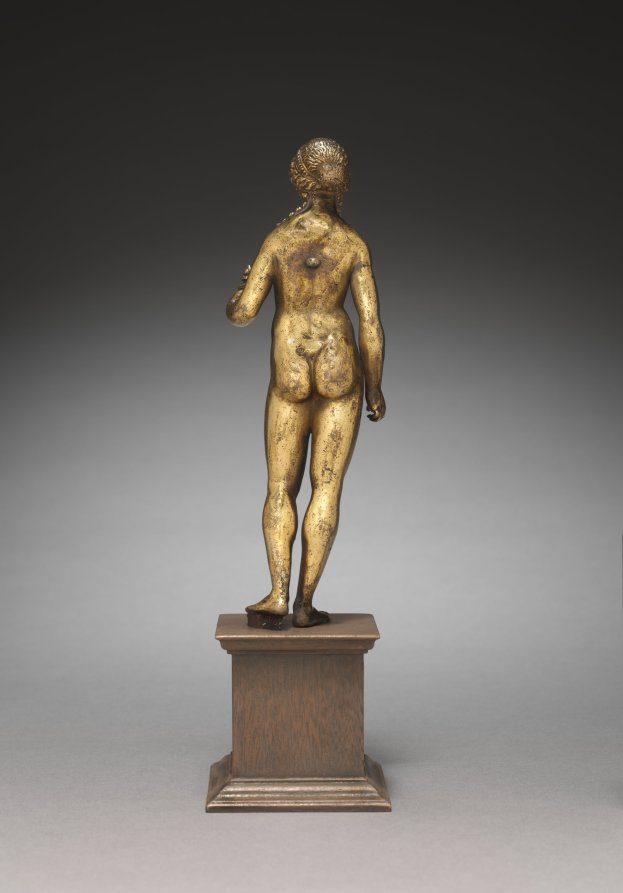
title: Venus with a Burning Urn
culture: Northern Italy, 16th century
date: c. 1500–1520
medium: gilt bronze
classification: Sculpture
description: Venus is the Roman goddess of many virtues, including Love, Charity, Fertility, and Victory. Here, Venus is represented as the goddess of Charity. She wears a crown, as Charity is often depicted as the Queen of the Virtues. The flaming lamp in Venus's left hand was also a symbol of Charity in Venice, where this piece is thought to have originated. The bent fingers of her right hand are bent suggest that Venus may have once held another object. Renaissance sculptors often looked back to antiquity when producing monumental and small bronze statues. The small bronze cabinet piece comes into Italian art during this time, bringing ancient gods and goddesses into Italian households. Venus stands in a contrapposto pose and, like Hellenistic and Roman objects, her locks are tied by a double ribbon while two curls fall on her shoulders. Her tilted head and large emotional eyes, as well as her small nose and parted lips reflect the influence of Hellenistic Greek facial styles.